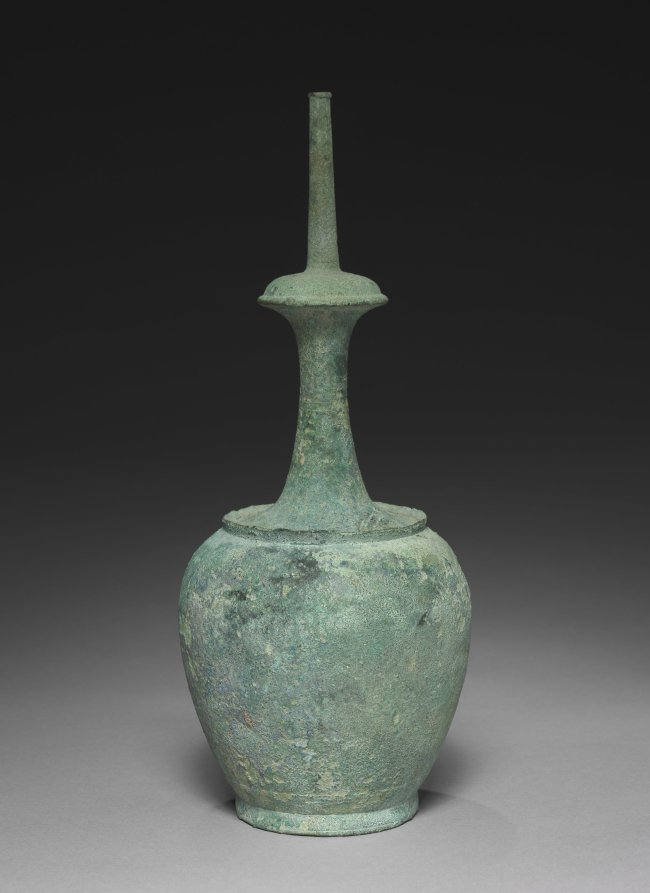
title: Water Ewer for Rituals (Kundika)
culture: Korea, Goryeo dynasty (918–1392)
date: 1100s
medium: bronze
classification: Metalwork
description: Known as kundika in Sanskrit, this distinctively shaped vessel served to purify a sacred space and to invoke a deity. In Korean Buddhist art, it appears primarily as an attribute of the Bodhisattva Avalokitesvara (Gwaneum in Korean). By the 12th century, however, it came to serve as aristocrats’ fancy water container for everyday use.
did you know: This distinctively shaped vessel is called a kundika in Sanskrit, simply referring to a water bottle.